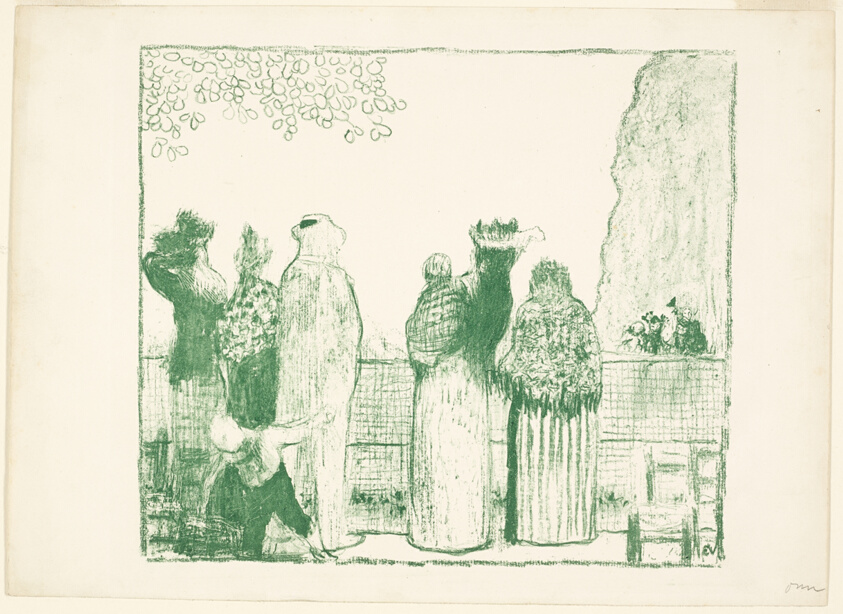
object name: Print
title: The Tuileries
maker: Edouard Jean Vuillard; French, 1868-1940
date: 1895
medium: Color lithograph on ivory wove paper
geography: France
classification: lithograph; print; prints and drawing